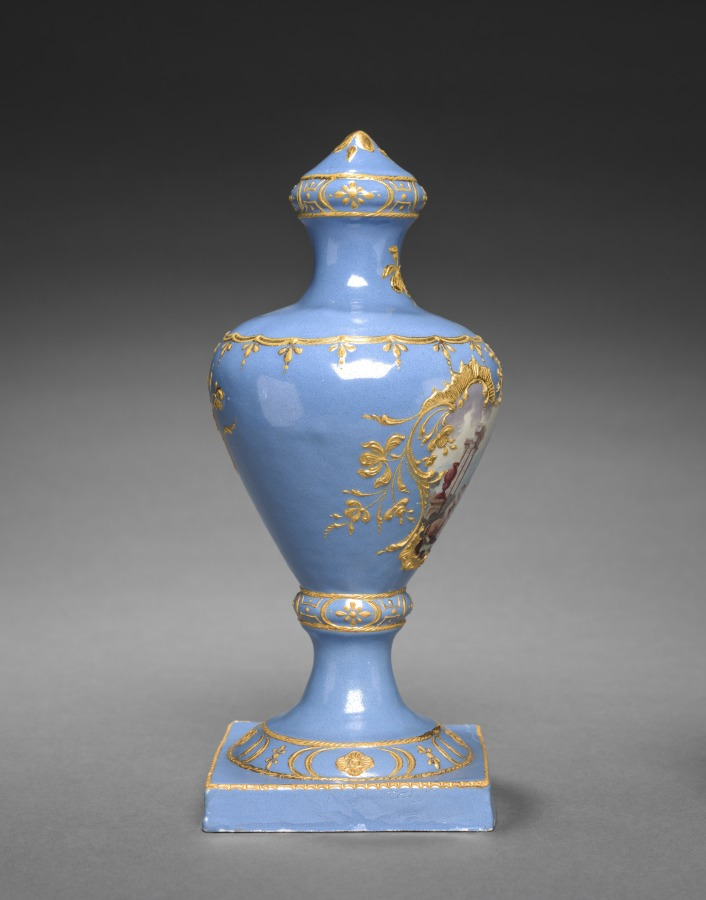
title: Urn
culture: England, South Staffordshire, 18th century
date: c. 1770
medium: enamel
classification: Enamel